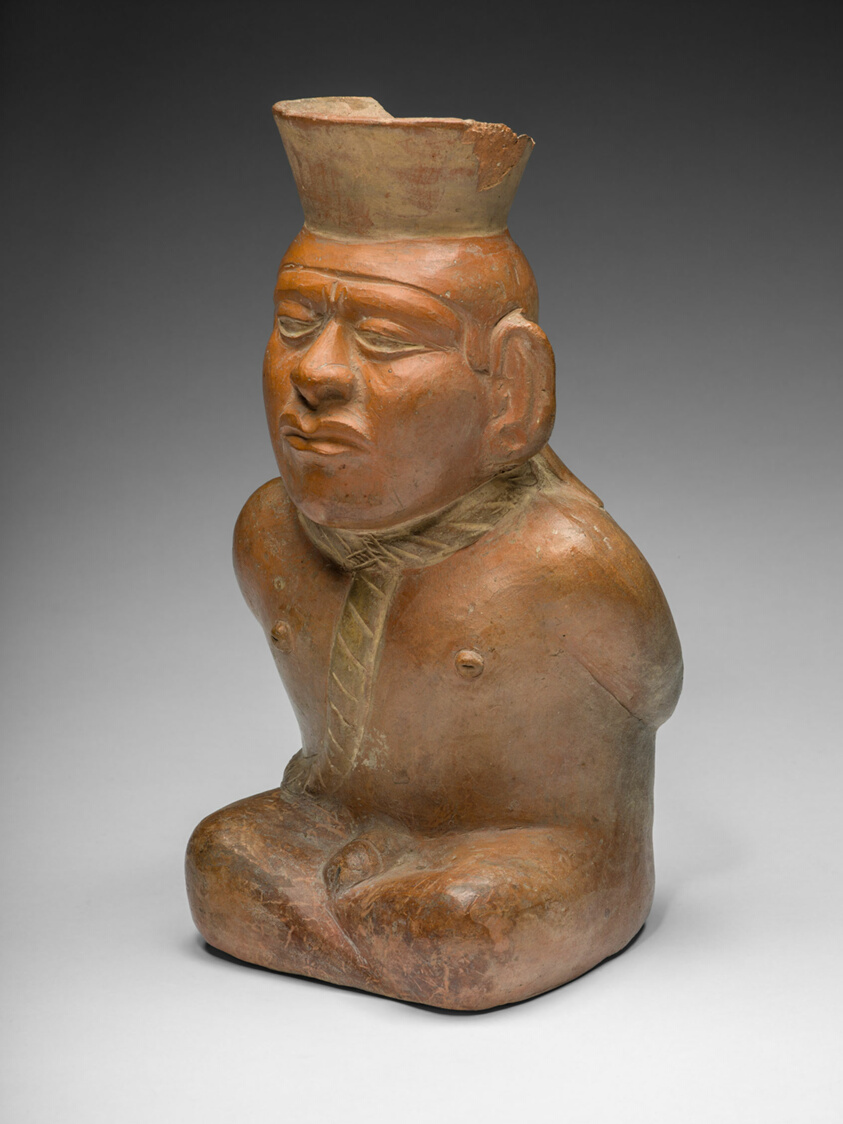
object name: Vessel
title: Portrait Vessel of a Captive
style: moche, mochica, early intermediate period, Pre-Columbian, americas, andes, Arts of the Americas, andean, south american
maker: Moche (North coast, Peru)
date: 100 BCE–500 CE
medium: Ceramic and pigment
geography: Peruvian North Coast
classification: earthenware; ceramics; vessel; art of the americas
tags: people, sacrifice, ritual sacrifices, rituals, portraits